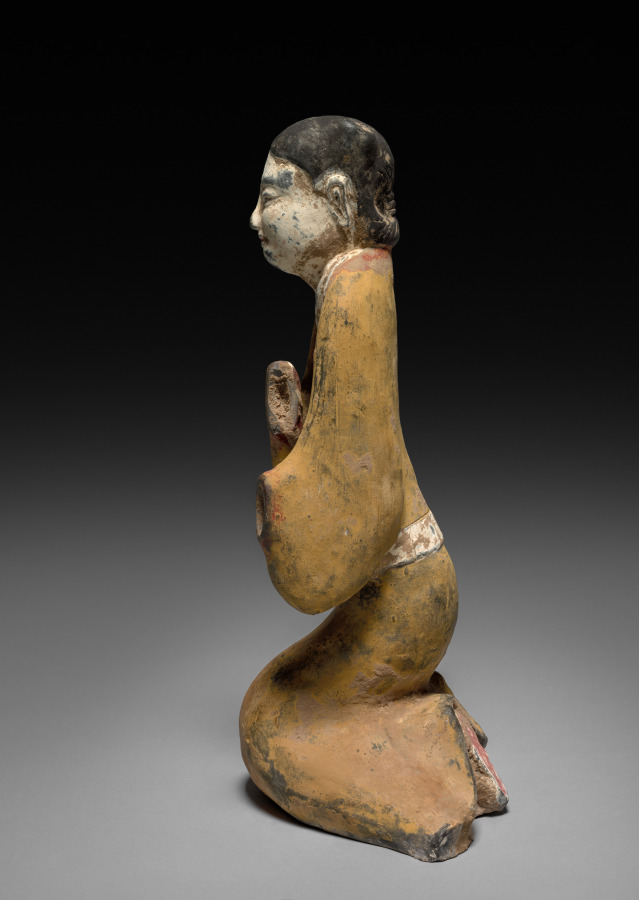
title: Kneeling Woman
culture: China, Western Han dynasty (206 BCE–8 CE) to Eastern Han dynasty (25–220 CE)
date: 100 BCE–100 CE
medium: painted earthenware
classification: Sculpture